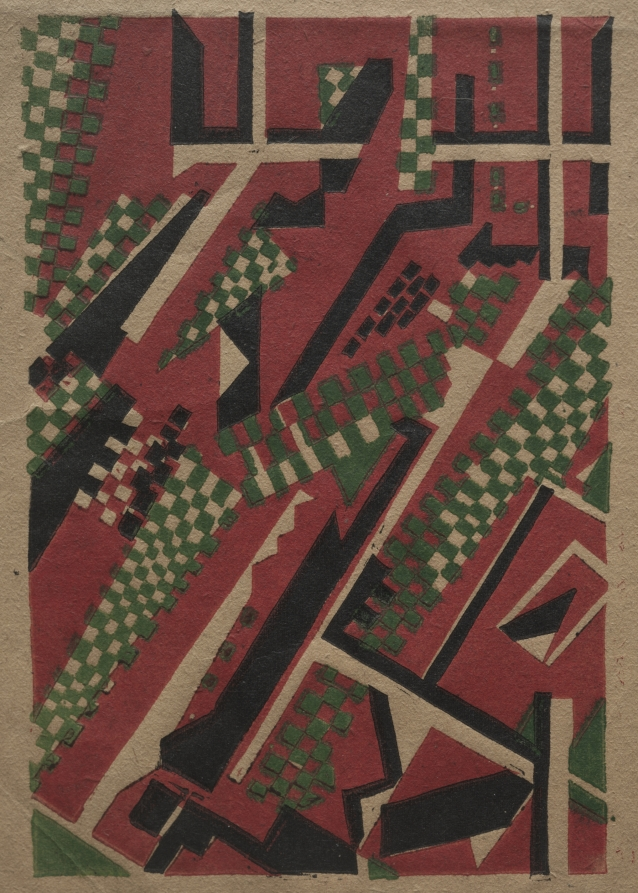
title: The Open Window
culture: England, 20th century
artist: Edward Alexander Wadsworth (British, 1889–1949)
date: c. 1914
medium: color woodcut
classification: Print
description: Open Window was inspired by Robert Delaunay's 1911 painting La Ville (The City). Like Delaunay, Wadsworth rendered a view over a city at night, but made the checkered patterning-which unites an array of motifs in the painted scene-the theme of his work. Wadsworth liked the possibilities woodcut gave him to explore complete changes of meaning through different color permutations. There are six versions of Open Window with various color combinations.